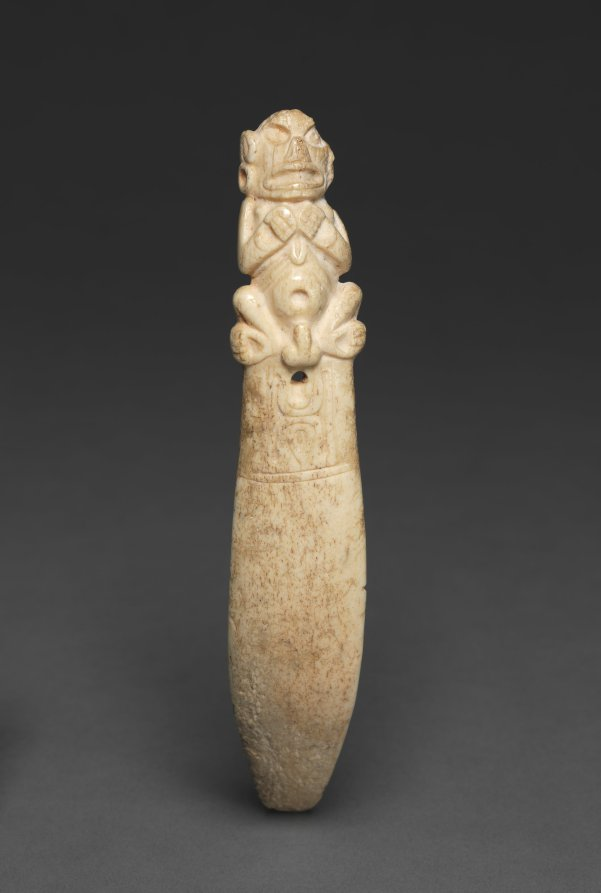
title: Spatula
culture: Caribbean, Greater Antilles, Taino, 10th-15th century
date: 900–1492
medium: manatee bone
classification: Sculpture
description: In 1492, when Christopher Columbus sailed into the Caribbean, the islands of Cuba, Hispaniola (Haiti and the Dominican Republic), Jamaica and Puerto Rico were inhabited by the Taino people. Taino religious ceremonies often included the snuffing of hallucinogenic herbs to alter the consciousness and facilitate contact with the spirit world. Carved spatulas were used to blend the powdered herbs. After purifying the body through purging the stomach, the snuff was inhaled into both nostrils.